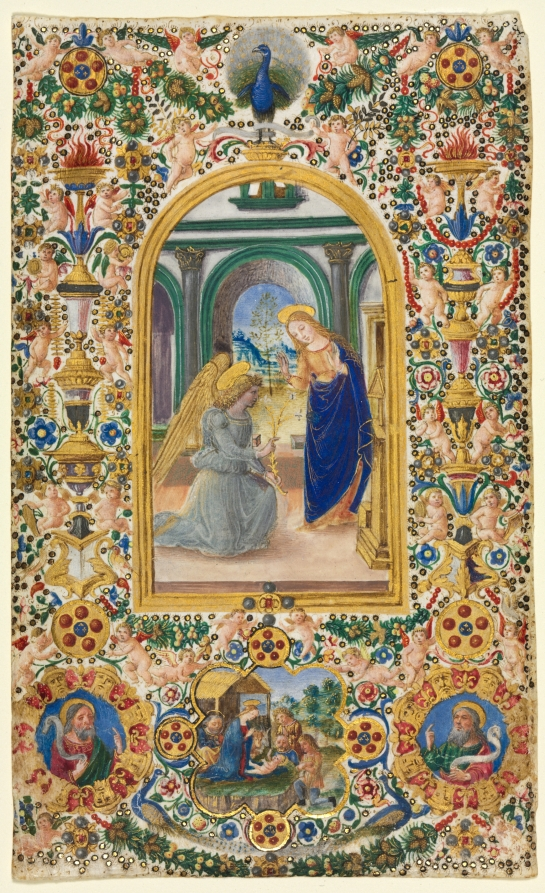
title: Leaf from a Book of Hours: Annunciation, Nativity and Two Prophets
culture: Italy, Florence, 15th century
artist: attributed to Master of Riccardiana 231 (Italian)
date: c. 1485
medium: tempera and gold on parchment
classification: Manuscript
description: This leaf came from a book of hours, a devotional book popular in the Middle Ages. They contained prayers that a devoted individual would use throughout the day. It has been estimated that 1 in 15 households owned a book of hours, although this luxurious example could only have belonged to an aristocratic household.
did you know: Peacocks were often used in medieval Christian art as a symbol of the resurrection and eternal life.